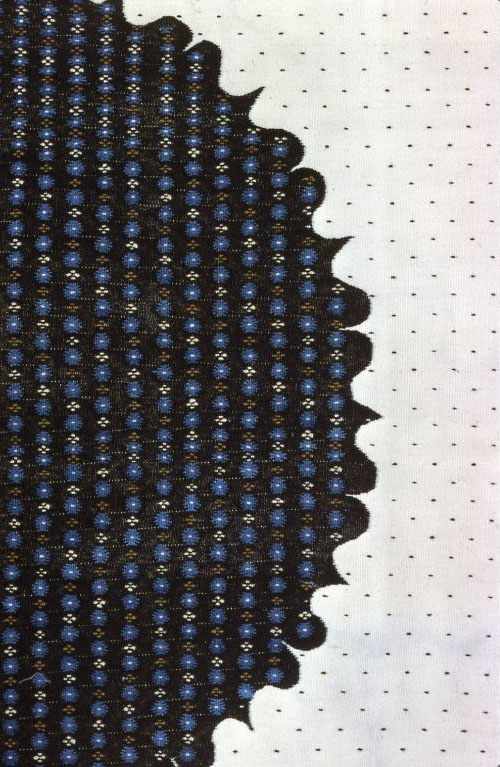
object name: Textile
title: Sarape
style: Folk Art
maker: Mexico, possibly Saltillo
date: 1850/1900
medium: Cotton and wool, single dovetail tapestry weave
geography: Mexico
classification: textile; weaving